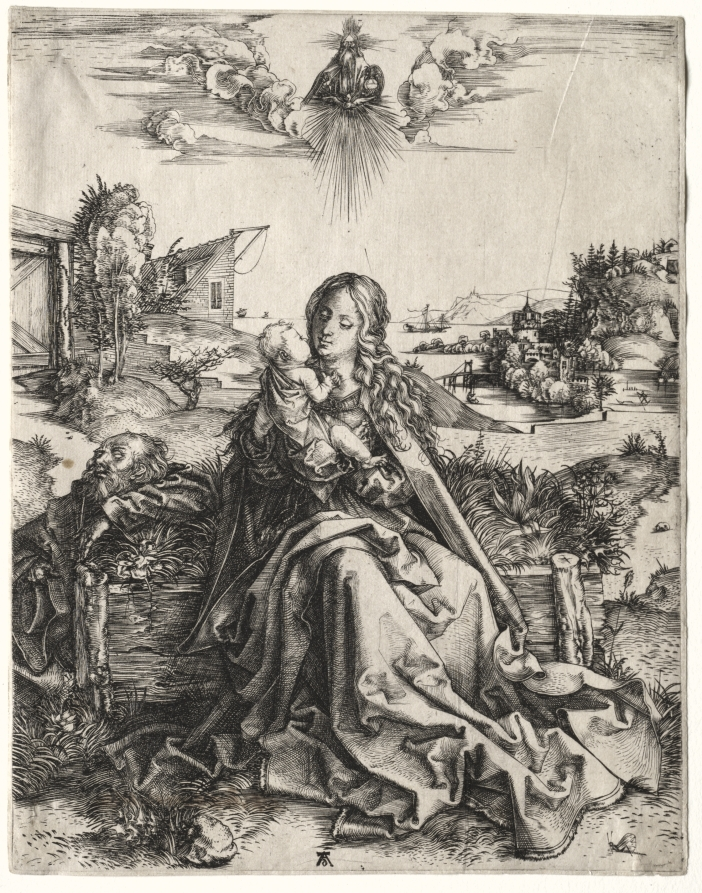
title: The Holy Family with the Butterfly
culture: Germany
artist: Albrecht Dürer (German, 1471–1528)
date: c. 1495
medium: engraving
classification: Print